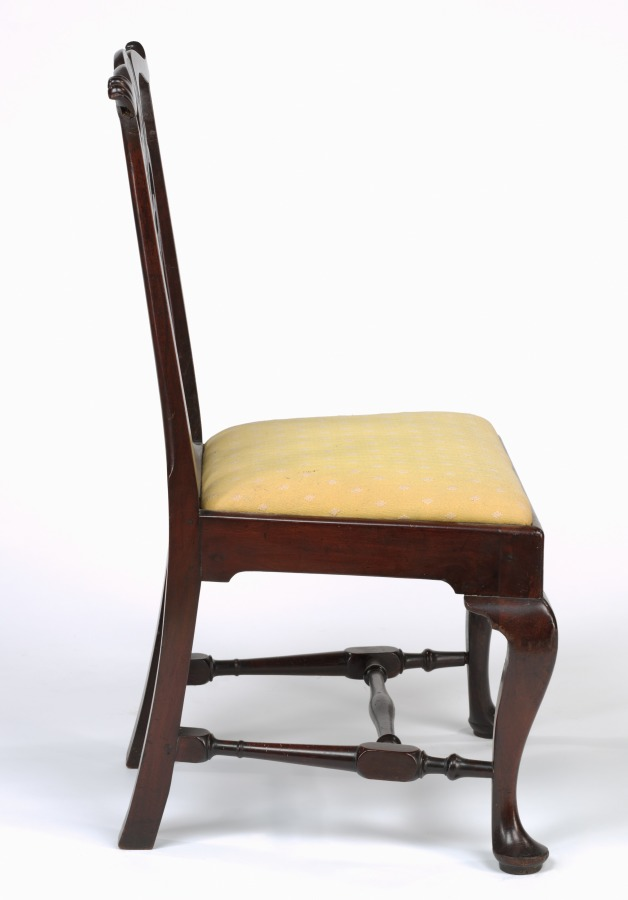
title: Side Chair (1 of 2)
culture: America, Rhode Island, Newport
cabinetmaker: John Townsend (American, 1732–1809)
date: c. 1775–90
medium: mahogany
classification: Furniture and woodwork